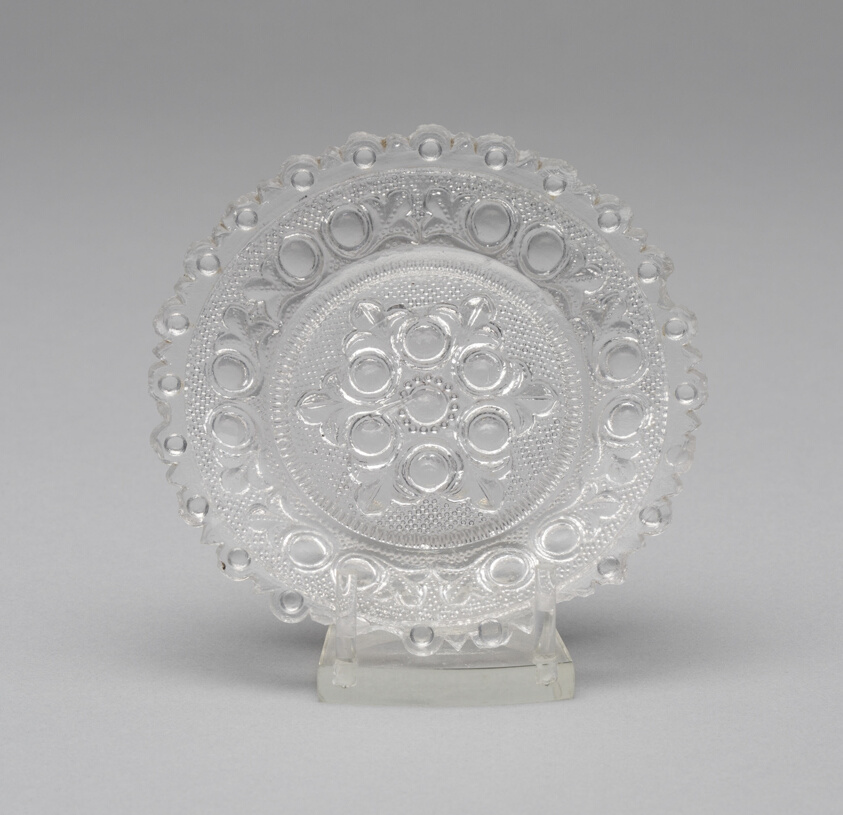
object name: Glass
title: Cup plate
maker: Artist unknown (American, 19th century); Midwest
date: 1830–35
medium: Pressed glass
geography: Midwest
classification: plate (general, dish); glass; american decorative arts; american arts; decorative arts